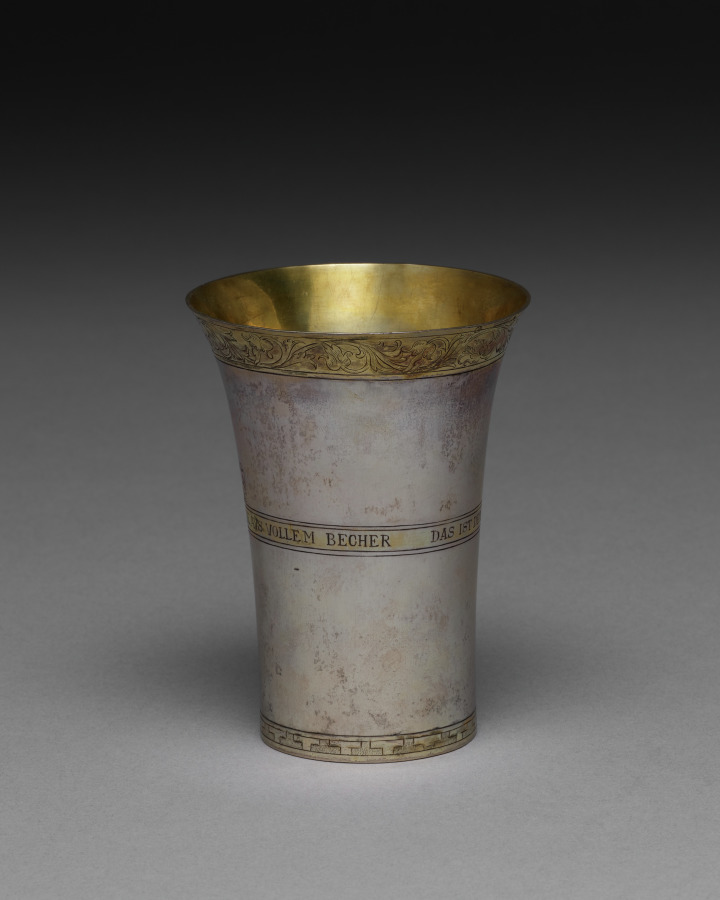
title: Beaker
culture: Germany, Munich, mid-18th century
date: mid 1700s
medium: silver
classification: Silver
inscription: Engraved around side: "EIN GVTER TRVNK AUS VOLLEM BECHER -- DAS IST DER BESTE SORGENBRECHER."